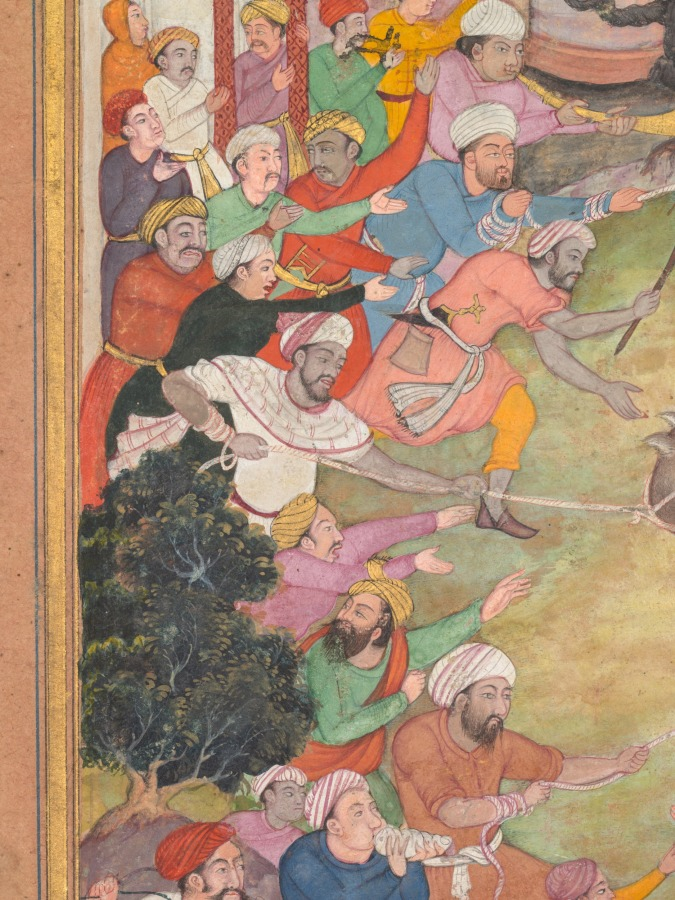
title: The game of wolf-running in Tabriz, from an Akbar-nama (Book of Akbar)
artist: Banavari 1 (Indian, active 1550s-1590s)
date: c. 1595–1600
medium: Gum tempera, ink, and gold on paper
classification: Painting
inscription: signed by Banwari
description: After four years of traveling in exile, fleeing Afghan forces, Humayun reached Tabriz, the glittering capital of the Safavid dynasty in northwestern Iran, here imaginatively rendered by the Indian artist. There the second Mughal emperor enjoyed warm hospitality extended by the shah of Iran, who called for a game of wolf-running for which the city was famous. Artists painting during the time of Akbar, late in his reign when historical subjects dominated, speculated as to how the game was played, based on eyewitness accounts. They gave the figures lively emotive expressions and gestures, and the dense crowding successfully conveys the pandemonium of the scene.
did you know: During extreme activities, turbans could come unwound and fall off.